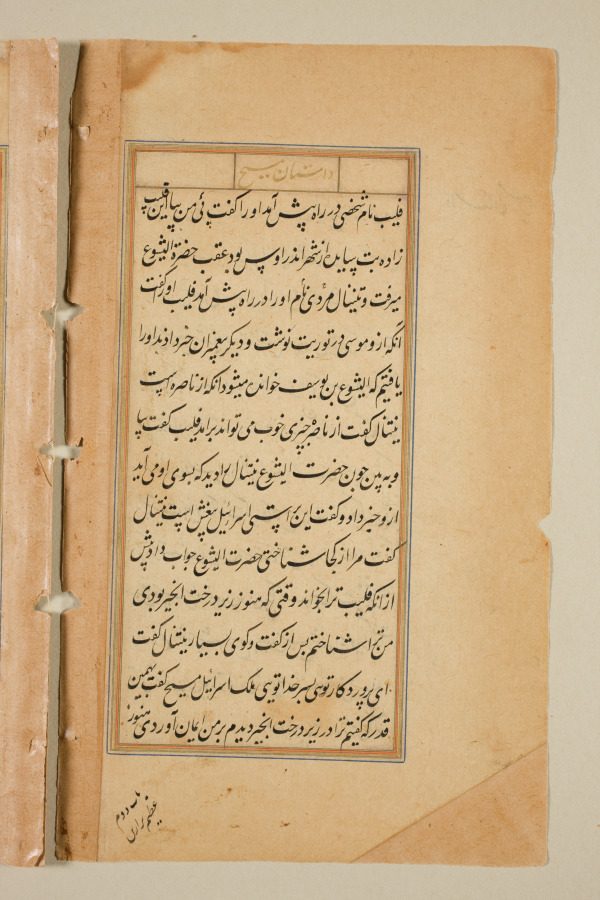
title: Text page from a Mirror of Holiness (Mir’at al-quds) of Father Jerome Xavier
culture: Mughal India, Allahabad, made for Prince Salim (1569–1627)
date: 1602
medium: Ink and gold on paper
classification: Manuscript